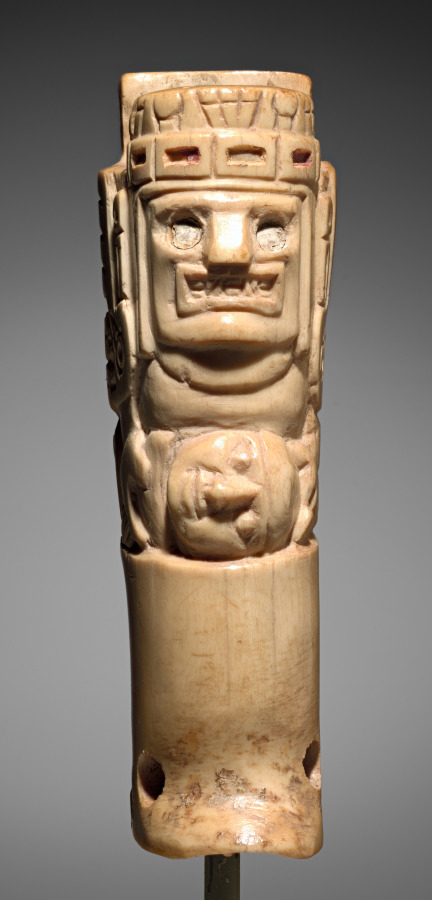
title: Thumb Rest of a Spear Thrower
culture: Andes, Wari people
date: 600–1000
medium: Bone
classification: Implements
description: This object was lashed to a spear thrower, where it served as a thumb rest or grip. The imagery is suited to the use: a supernatural being throttles a human, turning its head to expose its throat to a knife the being holds in one hand. Thus, the scene captures the crucial moment of an offering likely intended to assure the benevolence of divine forces.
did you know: Spear throwers, also called atlatls, use leverage to propel a spear faster and farther.